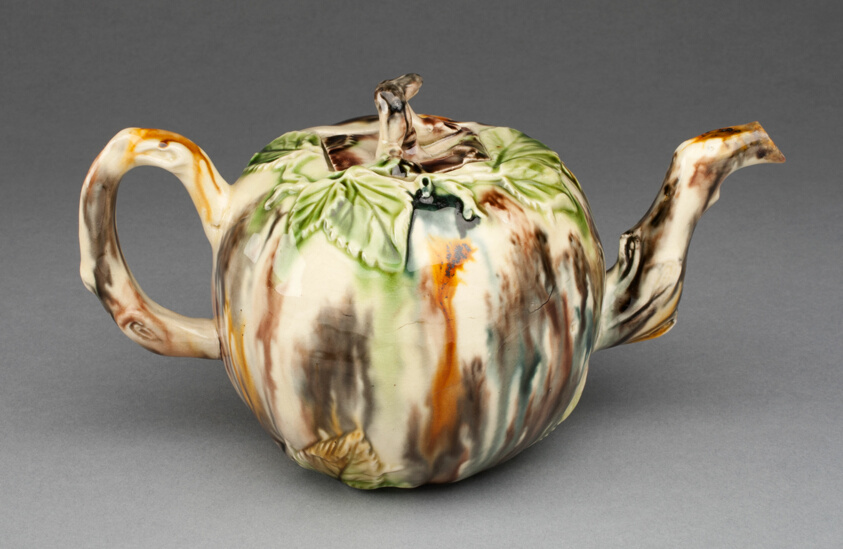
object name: Ceramics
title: Teapot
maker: Staffordshire, England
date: 1760/70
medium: Lead-glazed earthenware (creamware)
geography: Staffordshire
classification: teapot; ceramics; creamware; earthenware; european decorative arts; lead-glazed earthenware